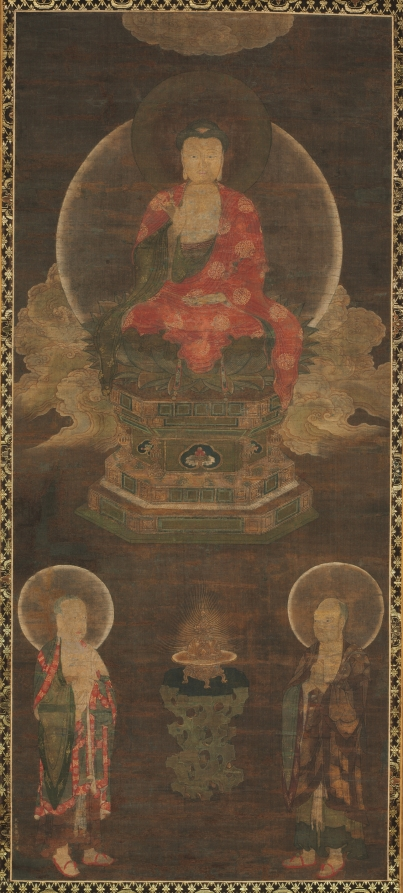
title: Shakyamuni Triad: Buddha Attended by Manjushri and Samantabhadra (Buddha)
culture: China, Fuzhou, Fujian Province, Yuan dynasty (1271-1368)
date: late 1300s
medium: Hanging scroll; ink and color on silk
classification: Painting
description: This triptych is a rare example of Yuan Buddhist painting. It depicts the historic Buddha Shakyamuni flanked by two attending bodhisattvas, Manjushri (the bodhisattva of wisdom, riding a lion) and Samantabhadra (the bodhisattva of universal virtue, riding an elephant). Below them are others seeking enlightenment: two disciples of the Buddha (Ananada and Kasyapa), two non-Chinese people, a boy with topknots, and a female worshiper. The clouds above and around the divine beings form one scene that illustrates Shakyamuni’s sermon from the Lotus Sutra. This text became an important basis for Buddhist faith throughout East Asia and was central to the Mahayana school of Buddhism.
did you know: Shakyamuni is seated cross-legged on the throne with the hand gesture (mudra) of giving instruction.